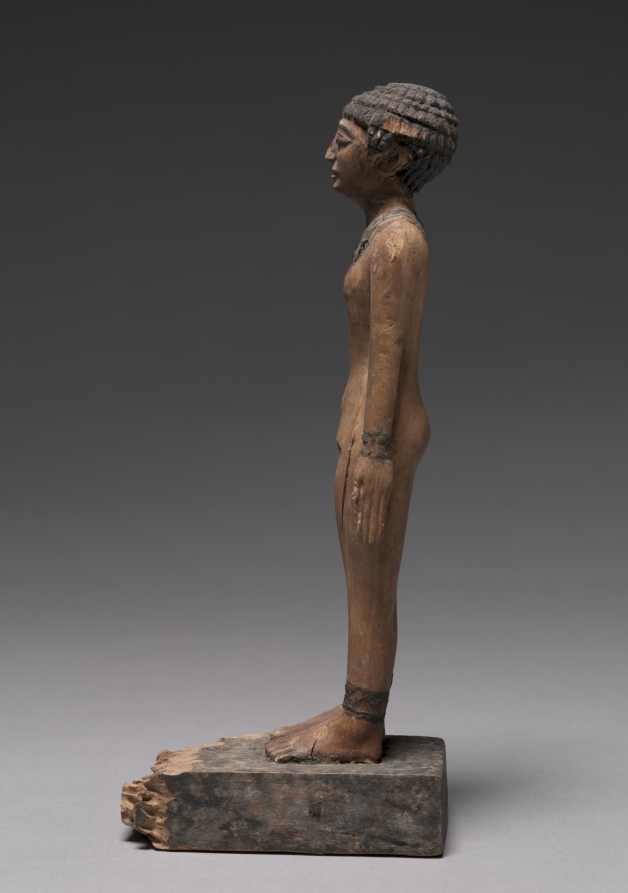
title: Female Statuette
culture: Egypt, Middle Kingdom (2040–1648 BCE), Dynasties 11–12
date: c. 2040–1859 BCE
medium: painted wood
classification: Wood